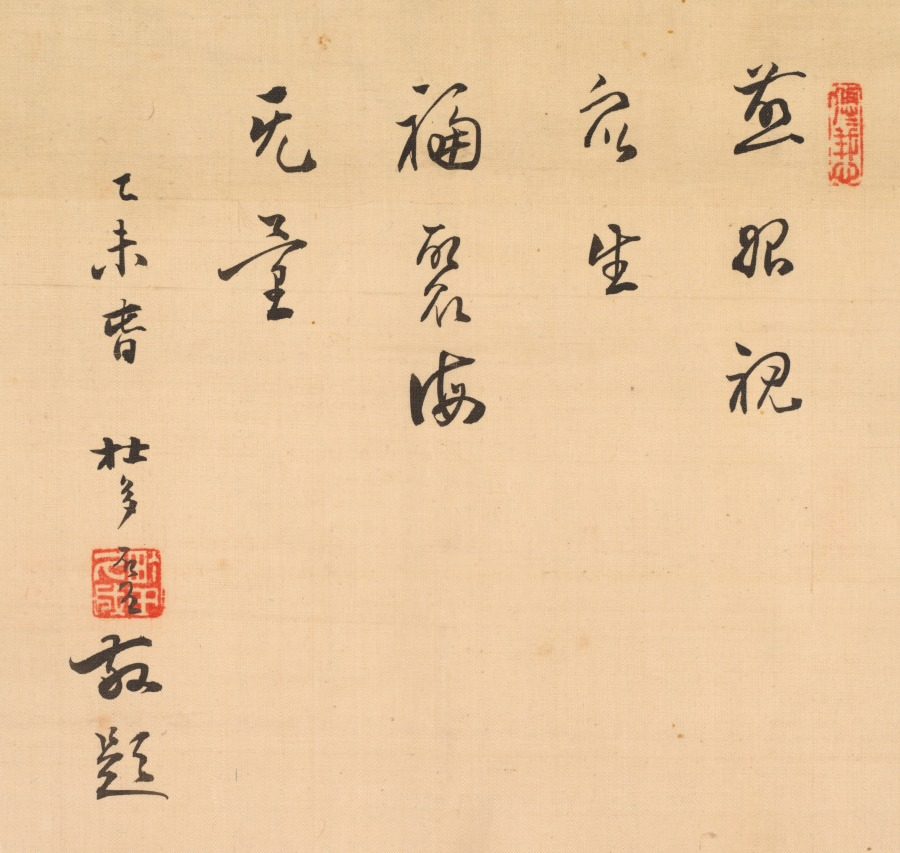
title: White-Robed Guanyin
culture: China, Yuan dynasty (1271-1368)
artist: copy after Jueji Yongzhong (Chinese, active around 1300)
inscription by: Zhongfeng Mingben (Chinese, 1263–1323)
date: late 1200s–early 1300s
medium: hanging scroll; ink and gold on silk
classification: Painting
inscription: Inscription: one of the 84,000 painted by the priest Insei.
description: The original model for this ink drawing of Guanyin, the bodhisattva of infinite compassion (Avalokiteshvara in Sanskrit), is CMA 1978.47.1. This drawing is a later copy with the same image of the White-Robed Guanyin, but in reverse. The inscription above reads: one of the 84,000 painted by the priest Insei. The inscription seems to indicate that the Japanese priest Insei repeatedly copied the image of the bodhisattva in an act of piety and to accumulate merit, as is promised in the Lotus Sutra for anyone who paints images of the Buddha, they “will achieve the Buddha path.” The priest’s name and seal need further study and identification.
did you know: The bodhisattva's face and halo were delicately painted in gold.